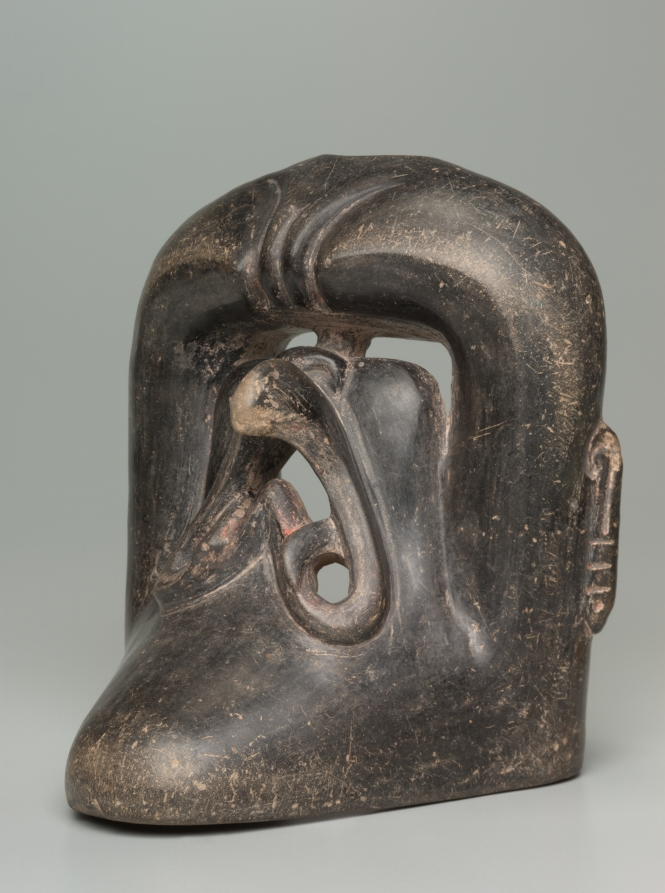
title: Vessel with Deity Mask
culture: Central Mexico (Las Bocas, Puebla?), Olmec, Formative Period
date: 1200–900 BCE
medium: ceramic, traces of pigment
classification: Ceramic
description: This unusual vessel is made of a U-shaped container and a sheet of clay modeled as a deity mask that is startling in its power: pierced eyes glare from the shadow of a muscular brow; the chin juts aggressively; and the part-bird, part-jaguar mouth opens in a shriek. This may be the face of the Olmec rain deity, the inspiration for much Olmec ritual and many accomplished works of art. The vessel may come from a grave or a buried offering.